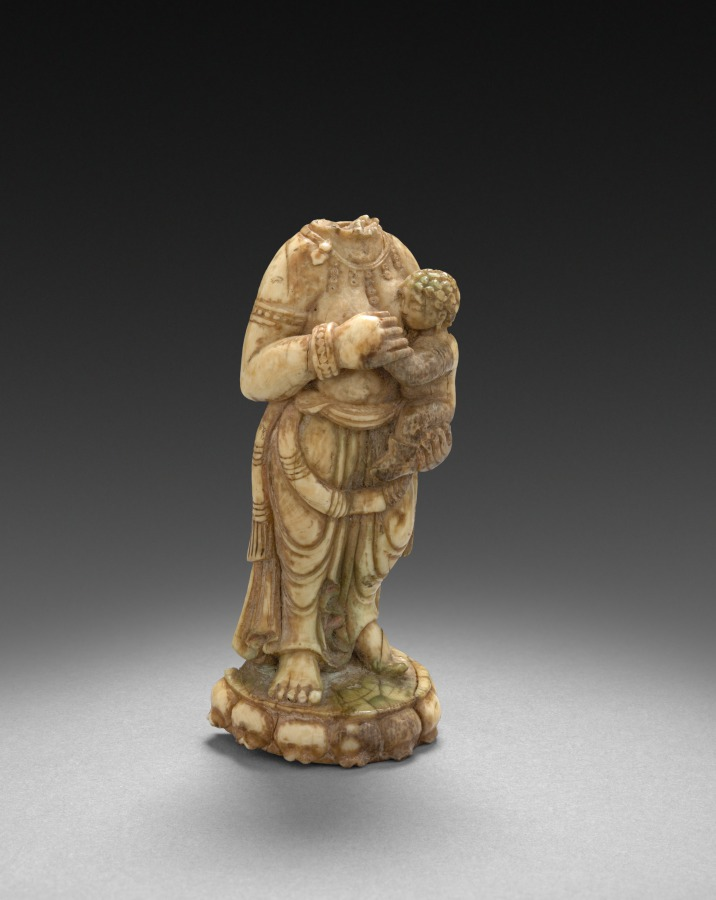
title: Hariti Statuette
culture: China, Tang dynasty (618–907)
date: 618–907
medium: ivory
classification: Sculpture